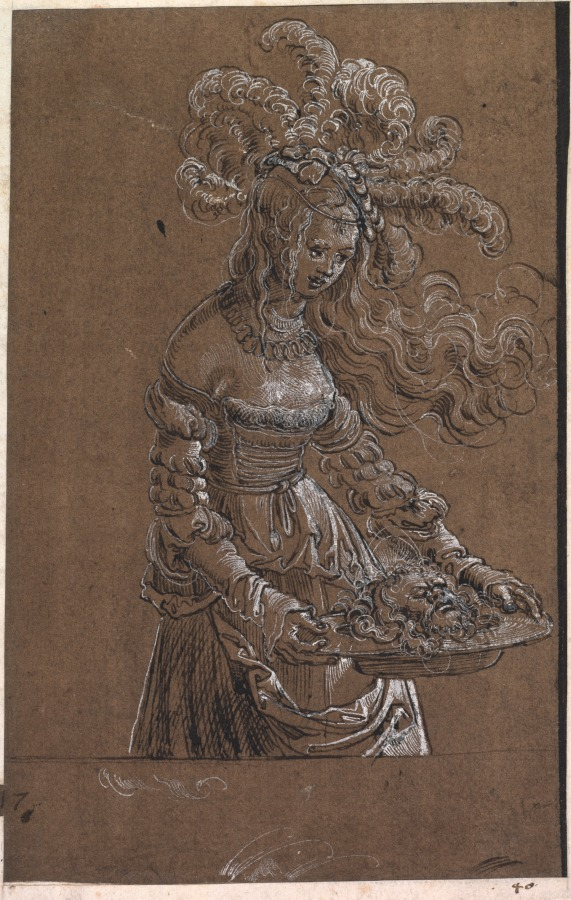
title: Salome with the Head of St. John the Baptist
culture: Germany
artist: Albrecht Altdorfer (German, c. 1480–1538)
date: c. 1517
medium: pen and brown ink and brush and brown wash and white gouache; framing lines in pen and black ink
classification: Drawing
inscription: lower right, in brown ink: 17; on paper mounted to recto, lower right, in brown ink: 40; verso of secondary support, center, in graphite: Liechtenstein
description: Salome's story is described in the biblical Gospels of Mark and Matthew. After dancing for King Herod of Galilee, her new stepfather, she was granted any wish she desired. Influenced by her mother, Herodias, she asked that John the Baptist--who was then imprisoned for condemning Herod and Herodias' marriage--be executed. Here, Salome enacts the most gruesome part of the story, presenting the prophet's head on a platter. In the Renaissance, the story was believed to presage the sacrifice of Christ on the cross and the presentation of the Eucharist during Catholic liturgy. Altdorfer's drawing emphasizes Salome's pride--a dangerous sin--through her elaborate garments, billowing, plumed headdress, and flowing long hair. He articulated these details using black ink highlighted with white gouache on paper darkened with brown wash and a finely pointed pen.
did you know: The artist colored the paper on this drawing a dark brown in order to emphasize the highlights and shadows created with inks.